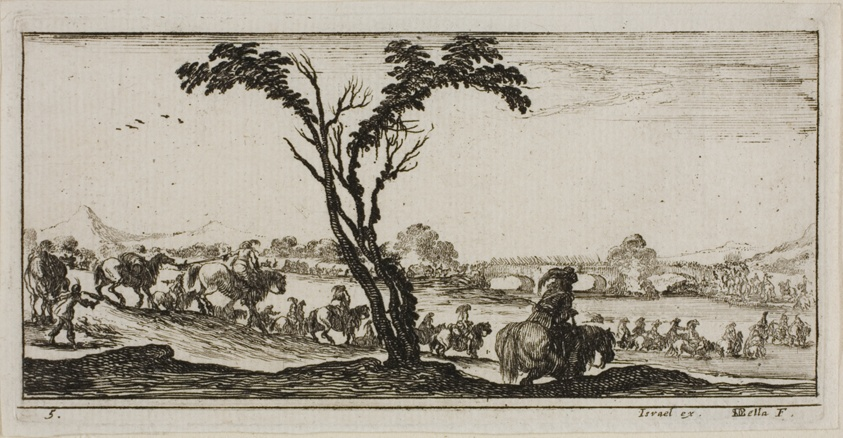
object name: Print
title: Plate Five from Drawings of Several Movements by Soldiers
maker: Stefano della Bella (Italian, 1610-1664)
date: 1644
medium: Etching on ivory laid paper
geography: Italy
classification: etching; paper; print; prints and drawing